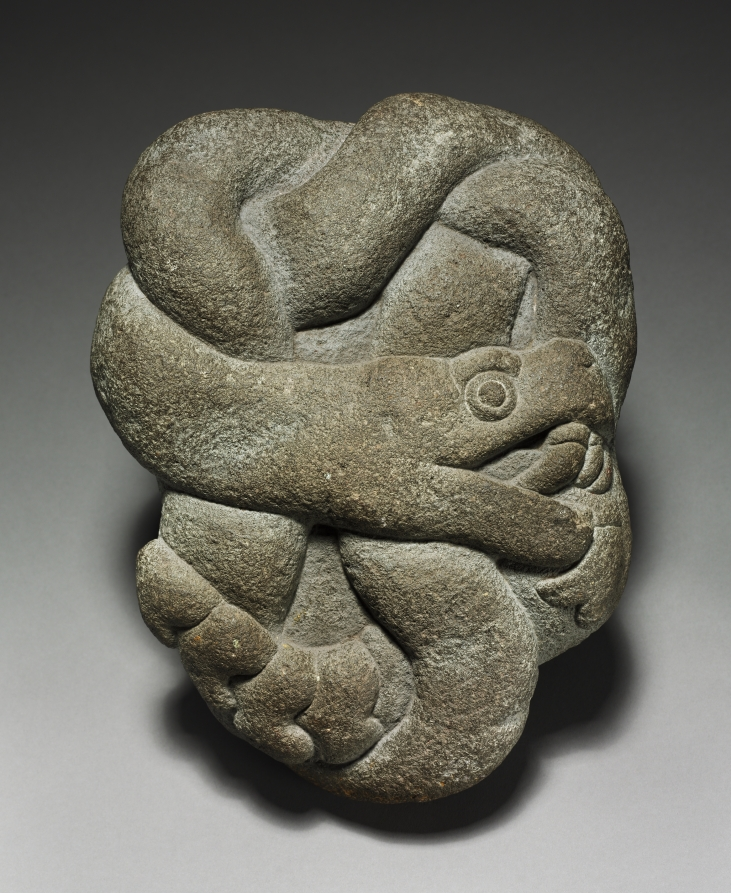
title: Coiled Rattlesnake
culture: Central Mexico, Aztec, 13th-16th century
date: c. 1200–1519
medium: stone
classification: Sculpture